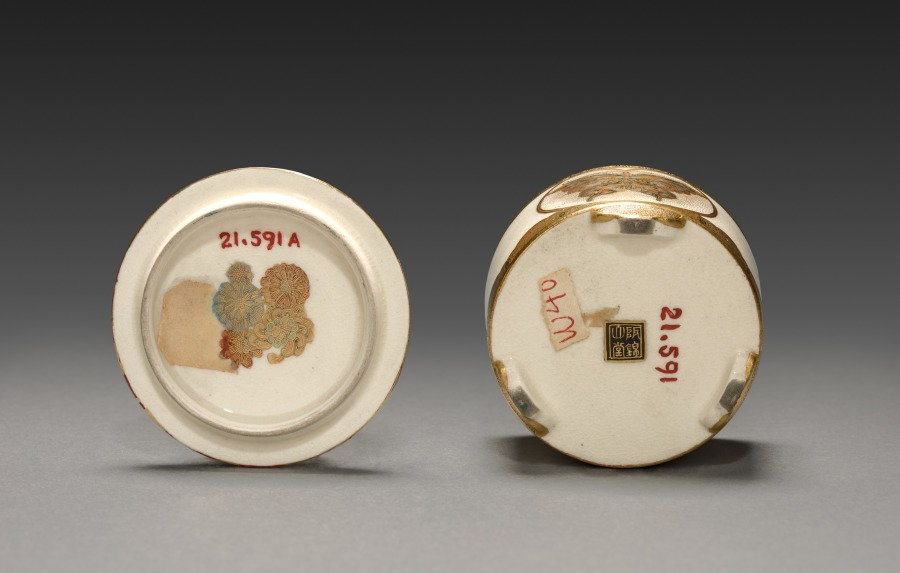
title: Jar with Butterflies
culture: Japan, Meiji period (1868–1912)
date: late 1800s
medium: porcelain (Satsuma ware)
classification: Ceramic